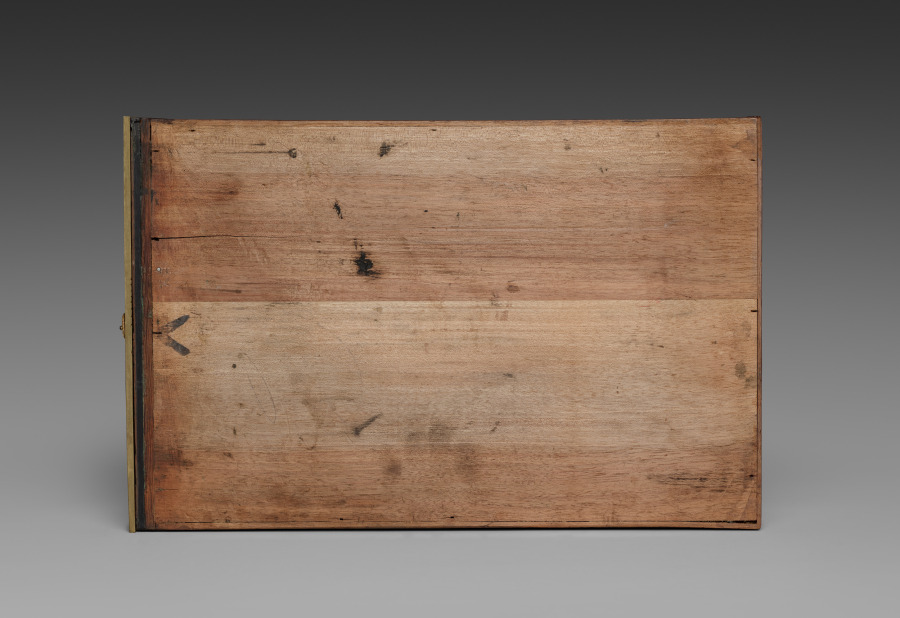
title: Side Drawer for Cabinet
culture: France, late 17th Century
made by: André-Charles Boulle (French, 1642–1732)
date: c. 1690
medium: ebony, marquetry in metal and tortoise shell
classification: Furniture and woodwork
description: Appointed cabinetmaker to King Louis XIV in 1672, André-Charles Boulle became a master of furniture making in France during the late 1600s until his death in 1732. Known primarily for his use of marquetry, in which metal patterns are inlaid into tortoiseshell then applied within the veneered surface of the furniture, Boulle established a level of quality and craftsmanship few others could achieve. As a result, his work found favor at the royal court and among other aristocrats and diplomats eager to impress the king. The inclusion of a medallion depicting Louis XIV within the bronze decoration of this chest would have identified the owner with the royal court. Often exhibiting stout architectural proportions with elegant groups of inlaid motifs such as the parrot on the central panel of this chest, Boulle’s designs are an example of the intellectual fashion for contrasting ideas, materials, and motifs.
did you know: Originally designed to sit atop an elaborate tall stand, this chest was likely altered in the late 1700s to reduce its scale and height.